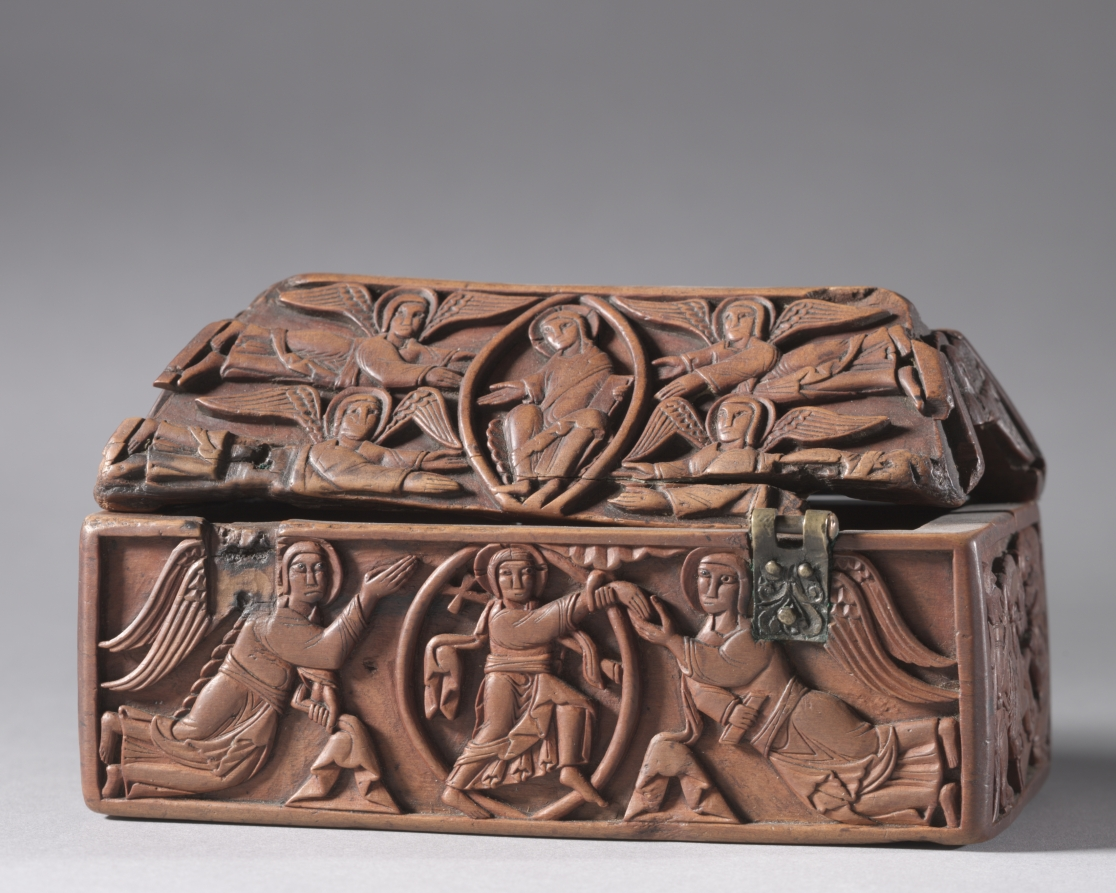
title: Wooden Casket: Scenes from the Life of Christ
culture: Anglo-Saxon, England, West Midlands?, Romanesque period, 11th century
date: c. 1050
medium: boxwood, copper-alloy, glass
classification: Furniture and woodwork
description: This casket is a rare, if not unique example of high-quality woodcarving from Anglo-Saxon England. Decorated with scenes from Christ’s life, it was likely made for an ecclesiastical purpose and may have housed relics. On one long side, the Christ child rests in the manger. Above, the Crucifixion is shown with mourners gathered below the cross and two angels flanking it on either side. On the other long side is the Ascension, God’s hand pulling Christ heavenward. Christ in Majesty appears above. The short sides show Christ’s baptism and his entry into Jerusalem.